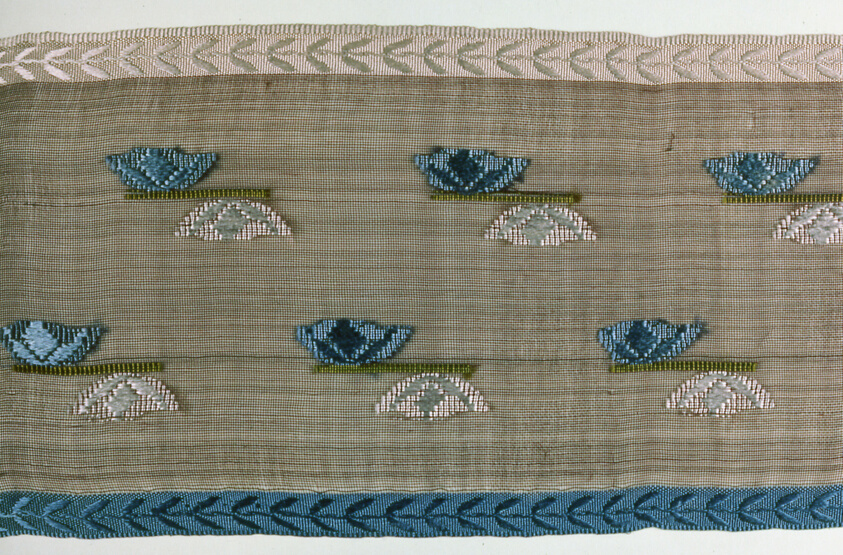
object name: Book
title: Sample Book of Gauze Ribbon Swatches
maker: France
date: 19th century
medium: Very fine silk gauze, plain weave with brocaded pattern; total of swatches: 186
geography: France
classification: textile; book; sample books